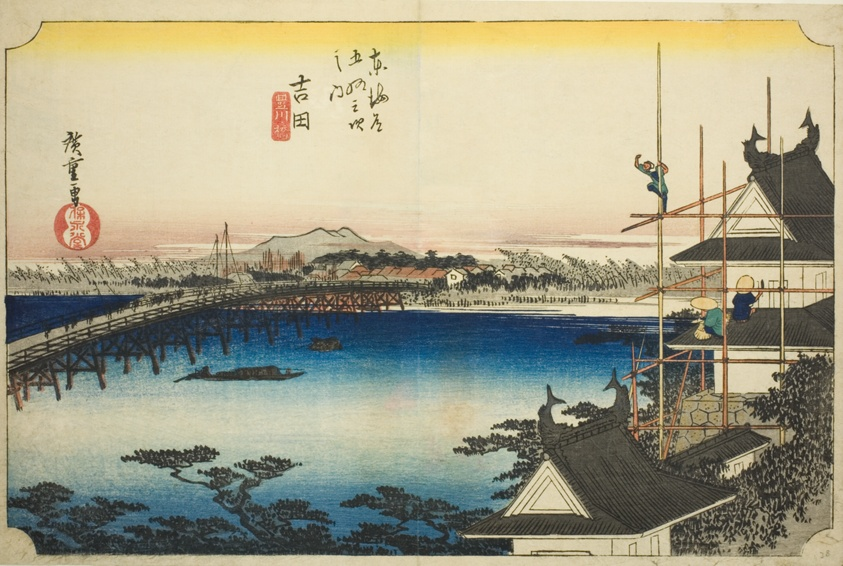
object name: Print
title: Yoshida: The Toyo River Bridge (Yoshida, Toyokawabashi), from the series "Fifty-three Stations of the Tokaido (Tokaido gojusan tsugi no uchi)," also known as the Hoeido Tokaido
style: Japanese (culture or style)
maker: Utagawa Hiroshige 歌川 広重; Japanese, 1797-1858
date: c. 1833/34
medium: Color woodblock print; oban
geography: Japan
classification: woodblock print; print; asian art